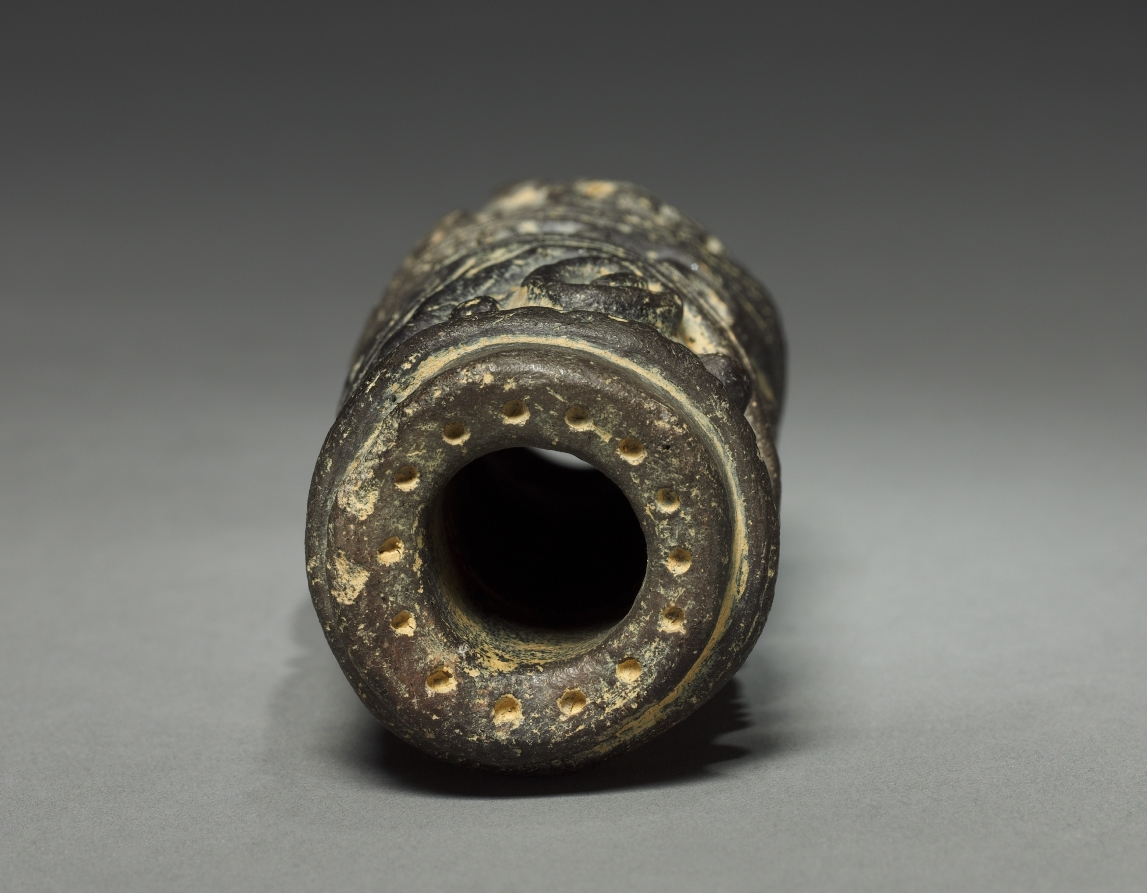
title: Roller Stamp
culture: Colombia, 19th-20th century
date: before 1921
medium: black ware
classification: Ceramic